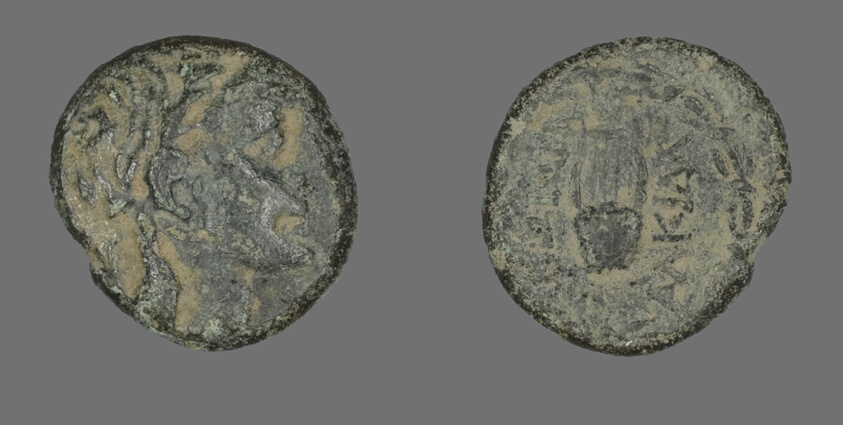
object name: Coin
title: Coin Depicting the God Apollo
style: greek, ancient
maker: Greek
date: about 88-50 BCE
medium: Bronze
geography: Ancient Greece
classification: coin; ancient art